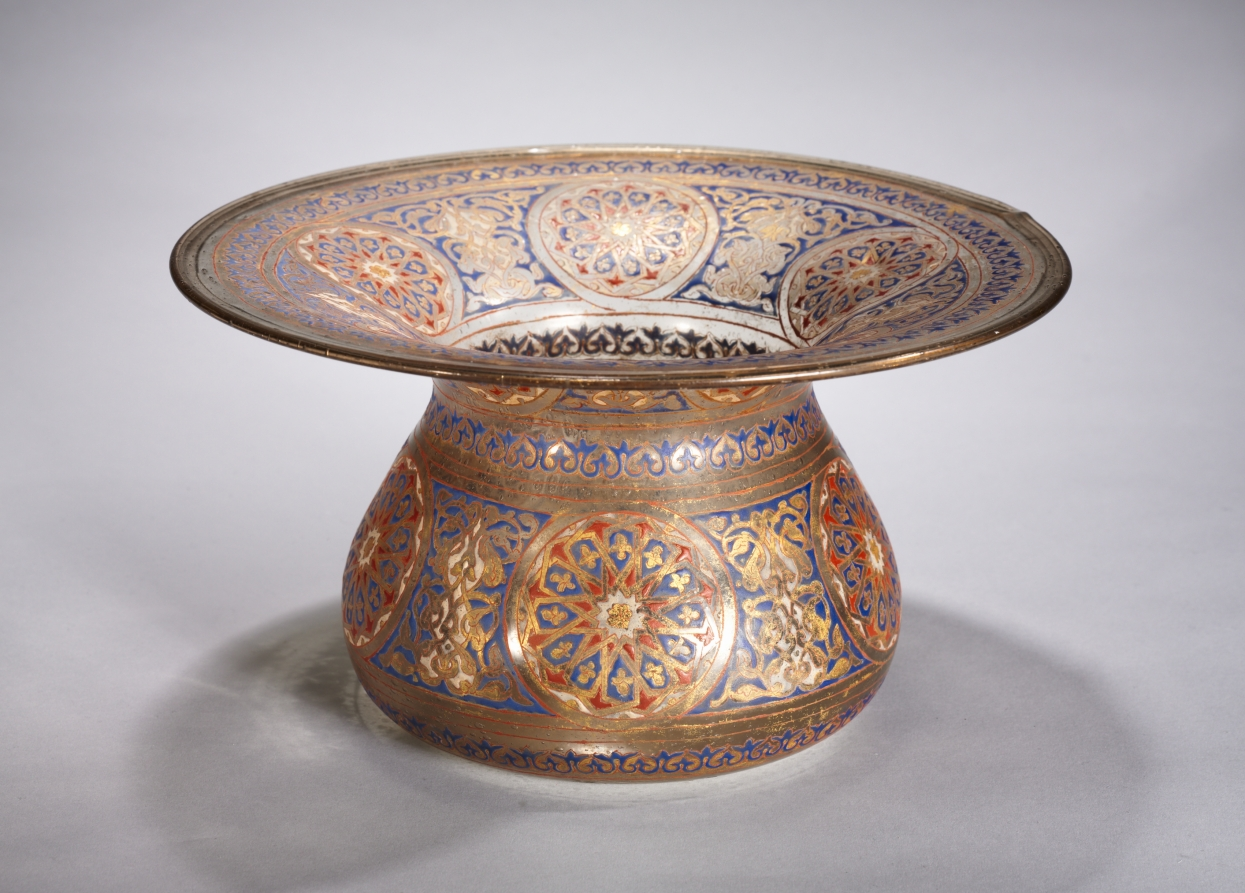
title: Ceremonial Spittoon or Basin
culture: Europe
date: late 1800s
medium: glass with enameled and gilded decoration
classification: Glass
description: This basin, as with the mosque lamp CMA 1981.10, is representative of reproductions of Mamluk glass that were prominent in the late 1800s in Europe during a period of resurgence of interest in Islamic art. At this time, collectors and artists revived the techniques of enameling and gilding that are hallmarks of Mamluk glass.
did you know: The intense enamel colors form striking star and leaf patterns.